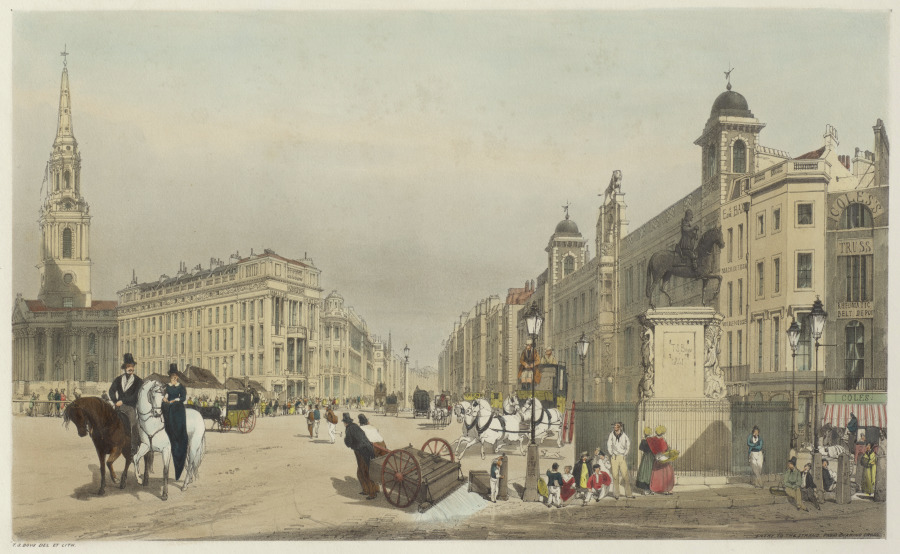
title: London As It Is: Entrance to the Strand, from Charing Cross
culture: England, 19th century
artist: Thomas Shotter Boys (British, 1803–1874)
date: 1841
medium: lithograph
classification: Bound Volume